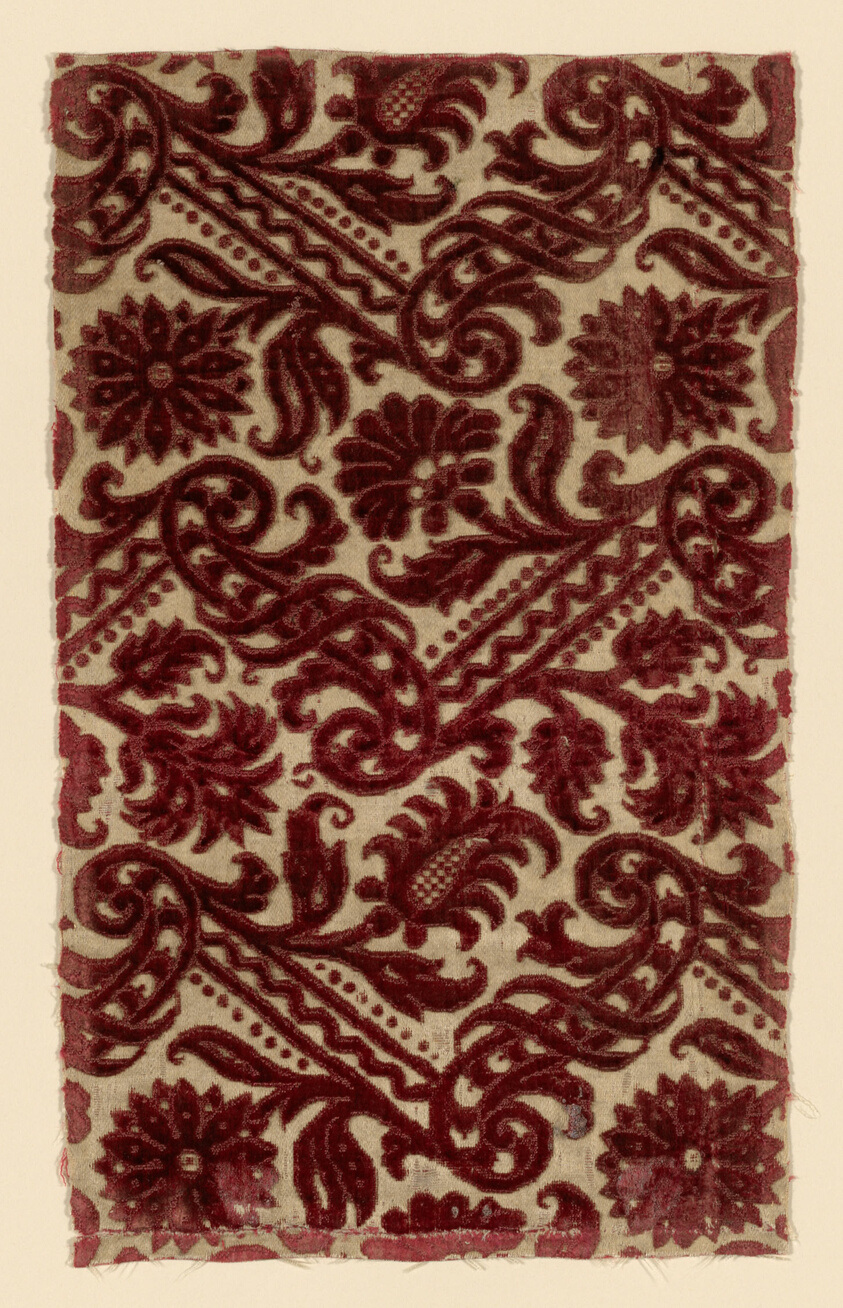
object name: Textile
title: Fragment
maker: Italy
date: 1601/25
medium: Silk, warp-float faced satin weave with supplementary pile warps forming cut, uncut, and voided velvet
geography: Italy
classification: textile; weaving - velvet; weaving